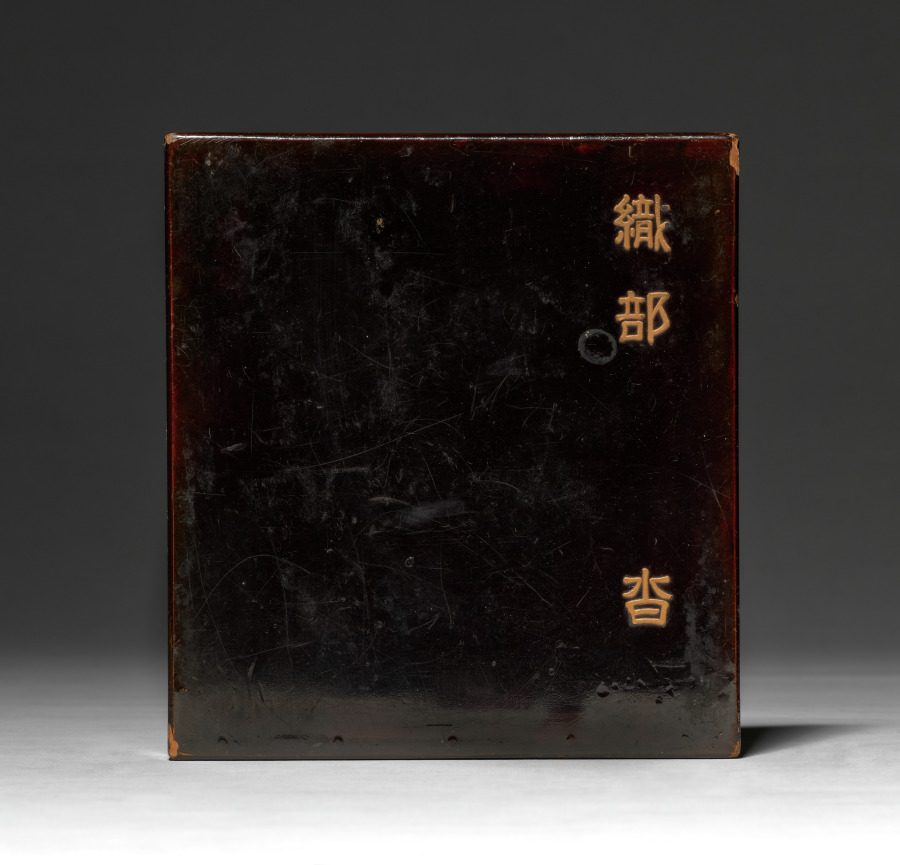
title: Clog-shaped Teabowl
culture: Japan, Momoyama period (1573–1615)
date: early 1600s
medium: Glazed stoneware (Mino ware, Oribe type)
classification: Ceramic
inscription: Mark: cross on base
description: Tea gatherings are fundamental to Japanese culture. Teabowls like this one are the most important objects used in tea practice. Its oblong shape and bold abstract designs are the signature style of the time period in which it was produced. That style is called Oribe, named for the tea master who championed the aesthetic.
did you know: Oribe is a government position. It means the person in charge of textiles.